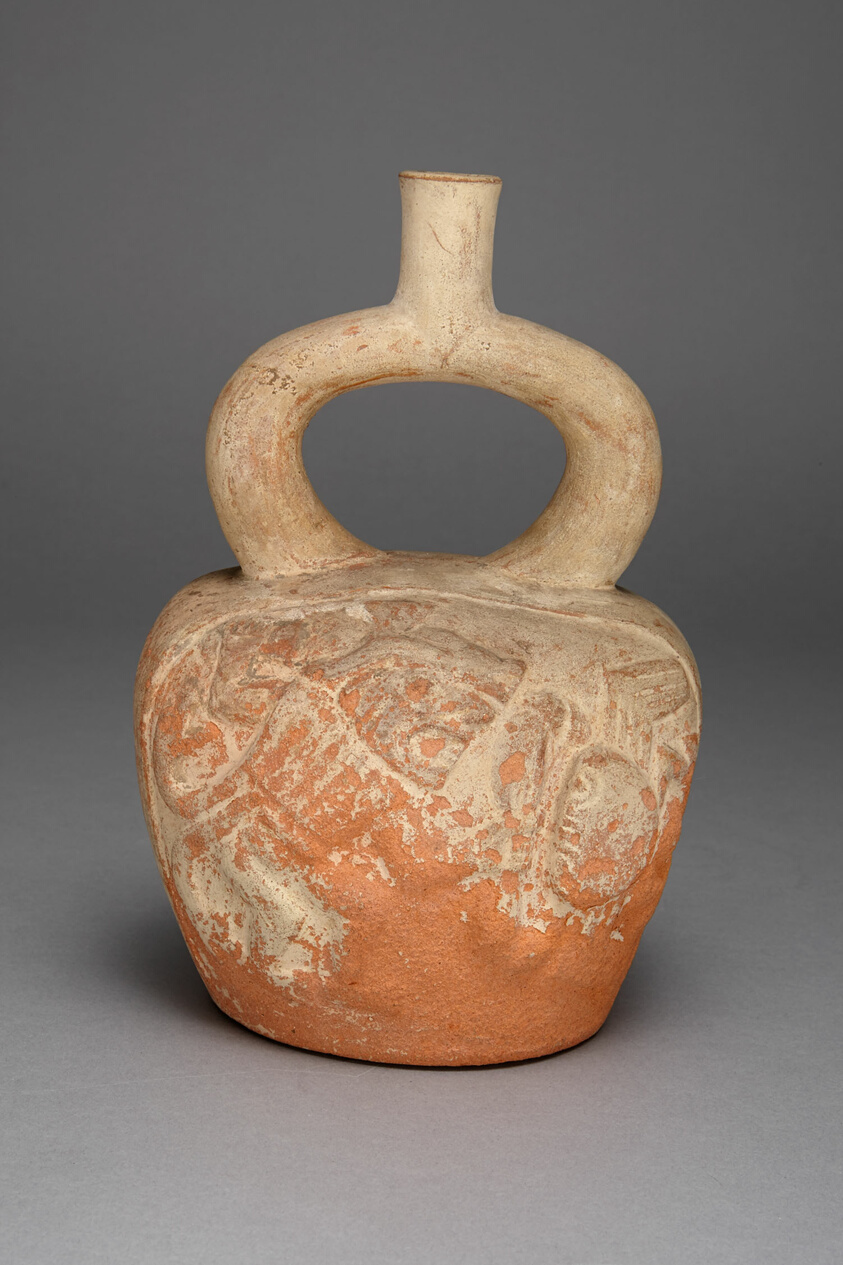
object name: Vessel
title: Stirrup Spout Vessel with Relief Depicting a Figure and Crab in Battle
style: moche, andes, Arts of the Americas, south american, andean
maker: Moche (Chimbote, Santa Valley, north coast, Peru)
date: 100 BCE–500 CE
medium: Ceramic and pigment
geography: Peruvian North Coast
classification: earthenware; ceramics; vessel; art of the americas